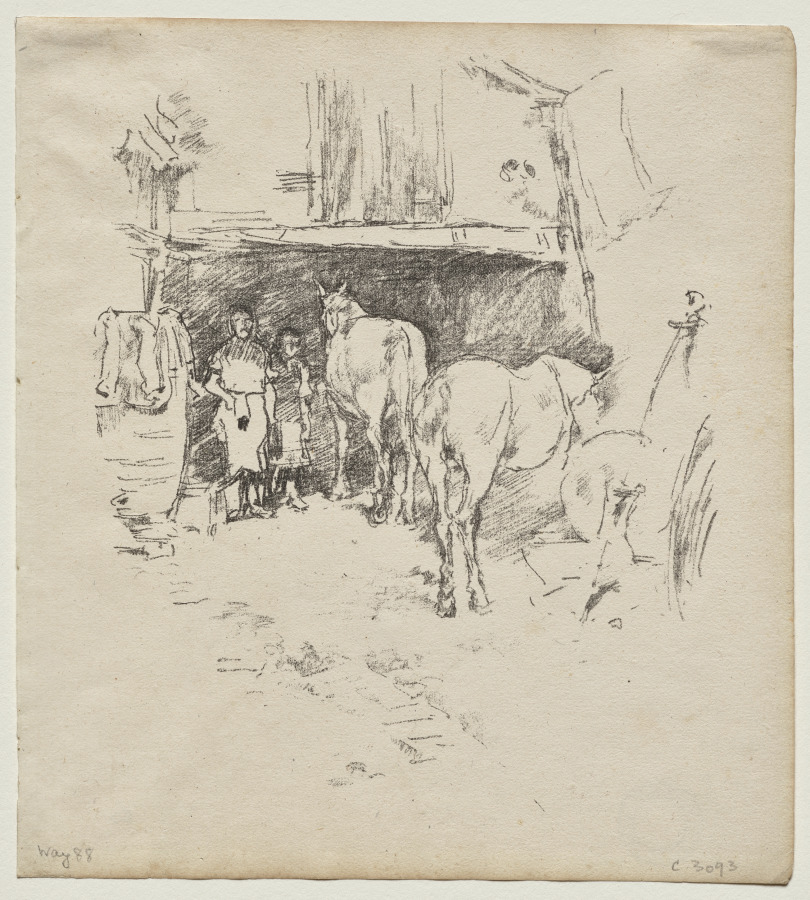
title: The Smith's Yard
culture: America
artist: James McNeill Whistler (American, 1834–1903)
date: 1895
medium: lithograph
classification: Print